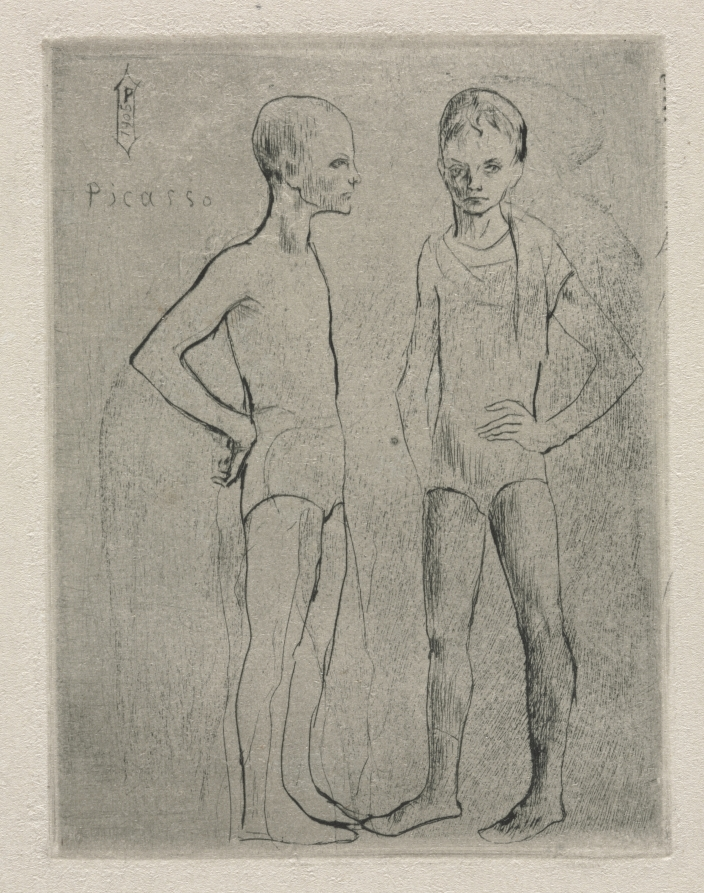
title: The Two Saltimbanques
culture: Spain, 20th century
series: The Saltimbanques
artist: Pablo Picasso (Spanish, 1881–1973)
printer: Louis Fort (French, active 1800s–1900s)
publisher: Ambroise Vollard (French, 1867–1939)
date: 1905, printed 1913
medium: drypoint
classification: Print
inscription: Signed, upper left, in plate: P1905 / Picasso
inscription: Watermark: VAN GELD[ER ZONEN]